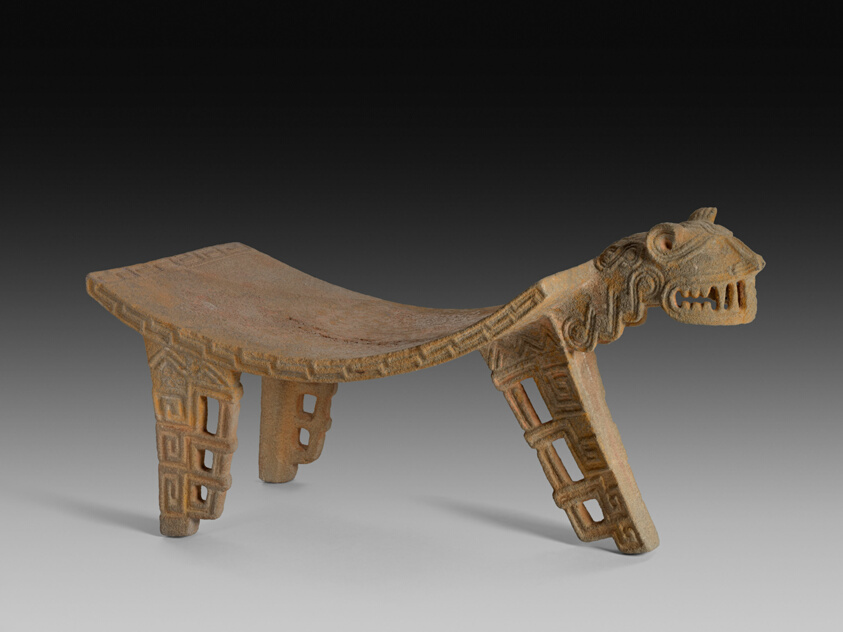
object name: Sculpture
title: Ceremonial Grinding Table (Metate) in the Form of a Feline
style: nicoya, americas, lower central america, Arts of the Americas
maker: Nicoya (Nicoya, Guanacaste province, Costa Rica)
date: 500–1000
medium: Volcanic stone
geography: Nicoya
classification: stone; art of the americas; ceremonial object; metate; sculpture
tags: feline, animals, geometric, Throne, rulership, food, maize, feast